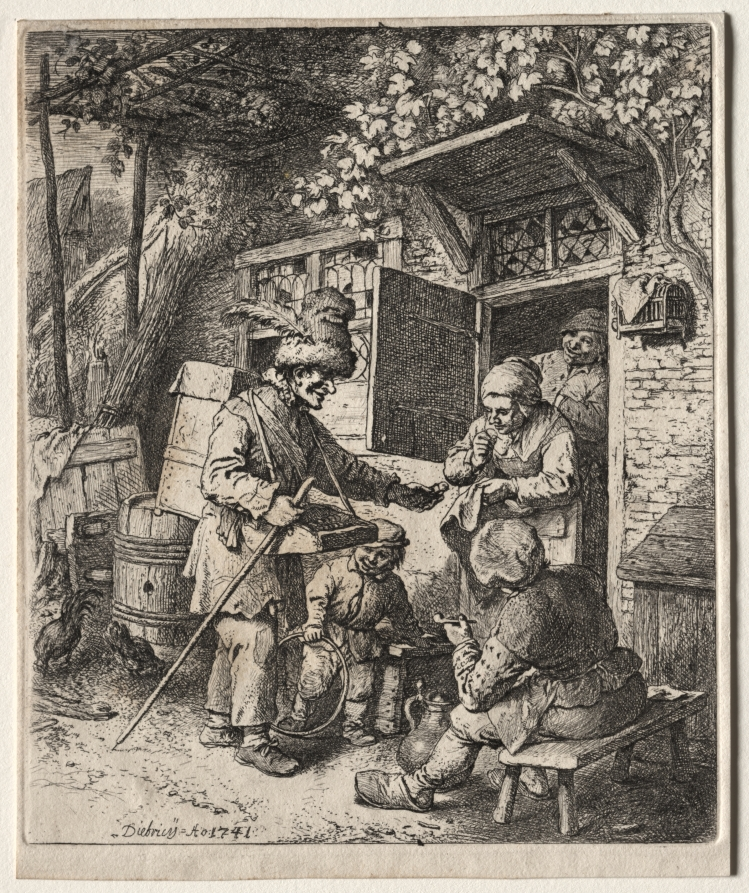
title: The Peddlar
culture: Germany, 18th century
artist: Christian Wilhelm Ernst Dietrich (German, 1712–1774)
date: 1741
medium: etching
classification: Print